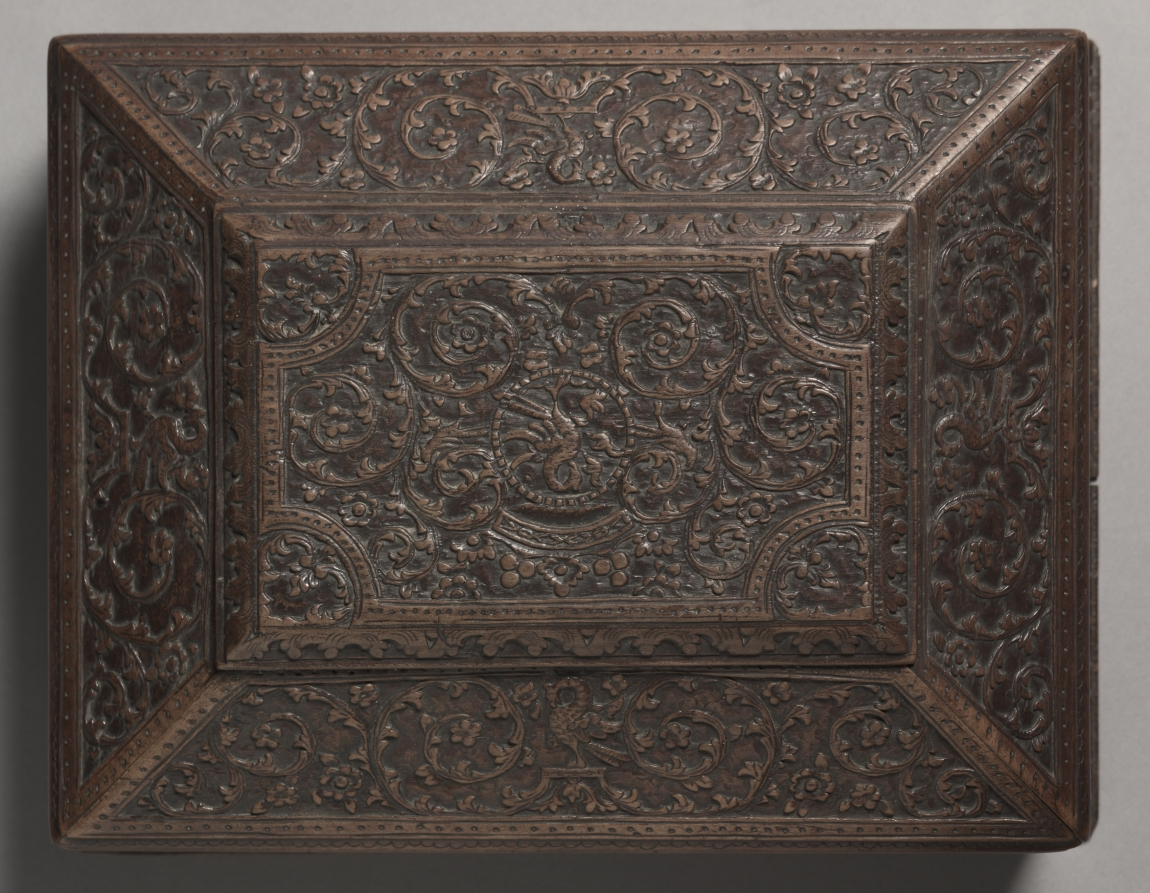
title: Box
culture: France, late 17th century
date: late 1600s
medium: wood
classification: Furniture and woodwork